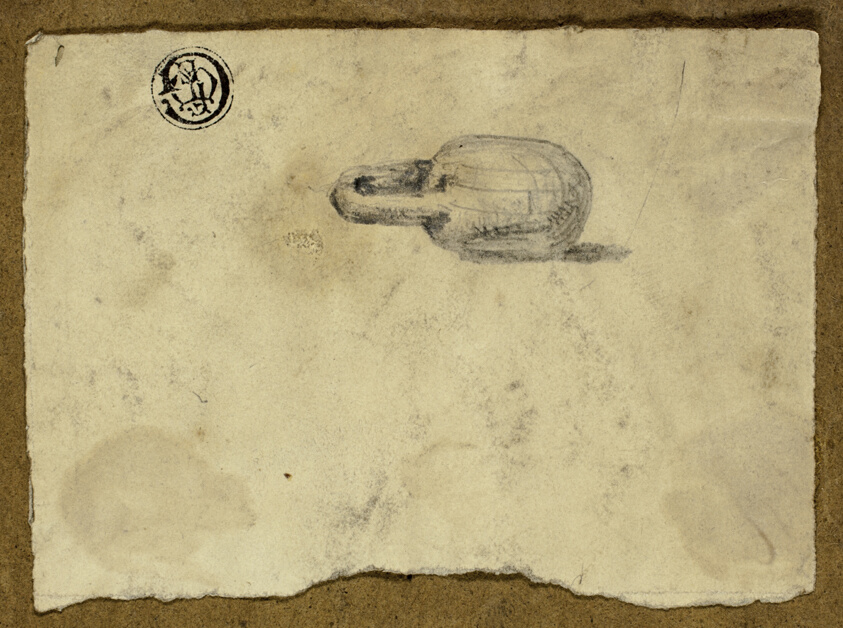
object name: Drawing and Watercolor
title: Unknown Article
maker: Unknown Artist; British, n.d.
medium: Graphite, on cream wove paper, tipped on brown wove paper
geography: United Kingdom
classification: graphite; drawings (visual works); prints and drawing